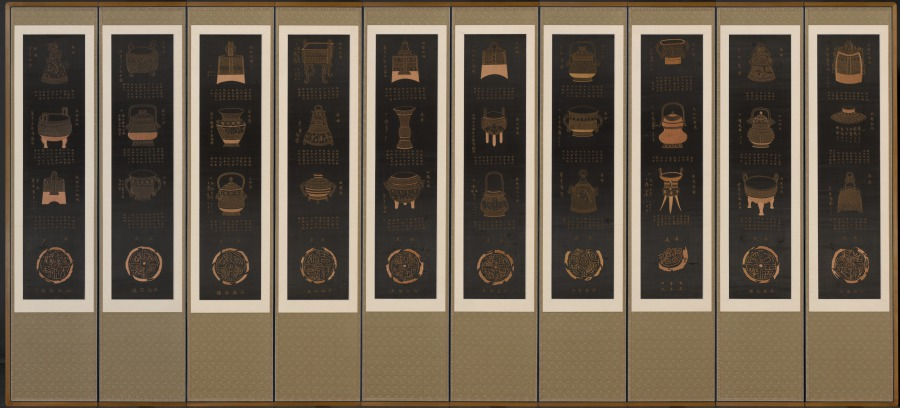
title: Ancient Chinese Bronzes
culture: Korea, Joseon dynasty (1392–1910)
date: late 1800s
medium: Ten-panel folding screen; embroidery, gold silk threads on black silk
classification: Textile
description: This embroidered folding screen depicts a set of bronze vessels. While the subject of bronze vessels is part of mainstream male elite culture, which centered on ancestral rituals, the written text that accompanies each bronze vessel expresses the idea of evoking good fortune and wishing for many children. The is perhaps related to the idea that those who diligently perform rituals for the spirit of ancestors could have all their aspirations realized.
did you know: The written text that accompanies each bronze vessel depicted in this embroidered screen expresses the idea of evoking good fortune and wishing for many children.